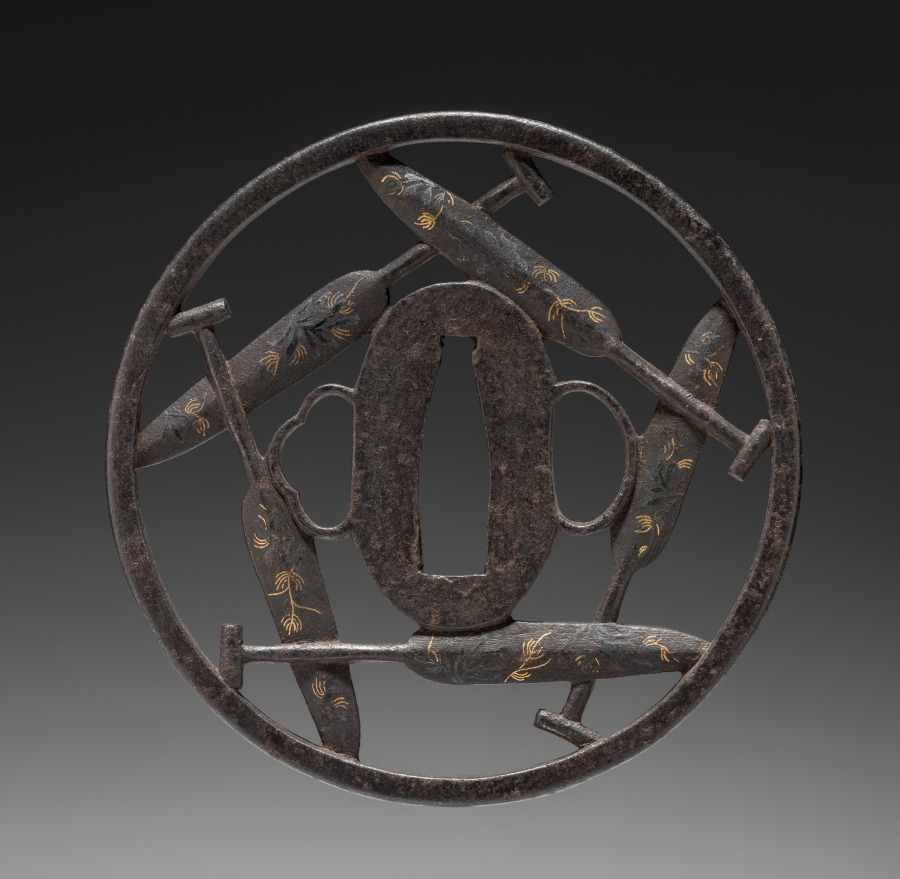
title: Sword Guard (Tsuba)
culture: Japan, possibly Edo period (1615-1868)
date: c. 1615–1868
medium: iron with gilt inlay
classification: Arms and Armor